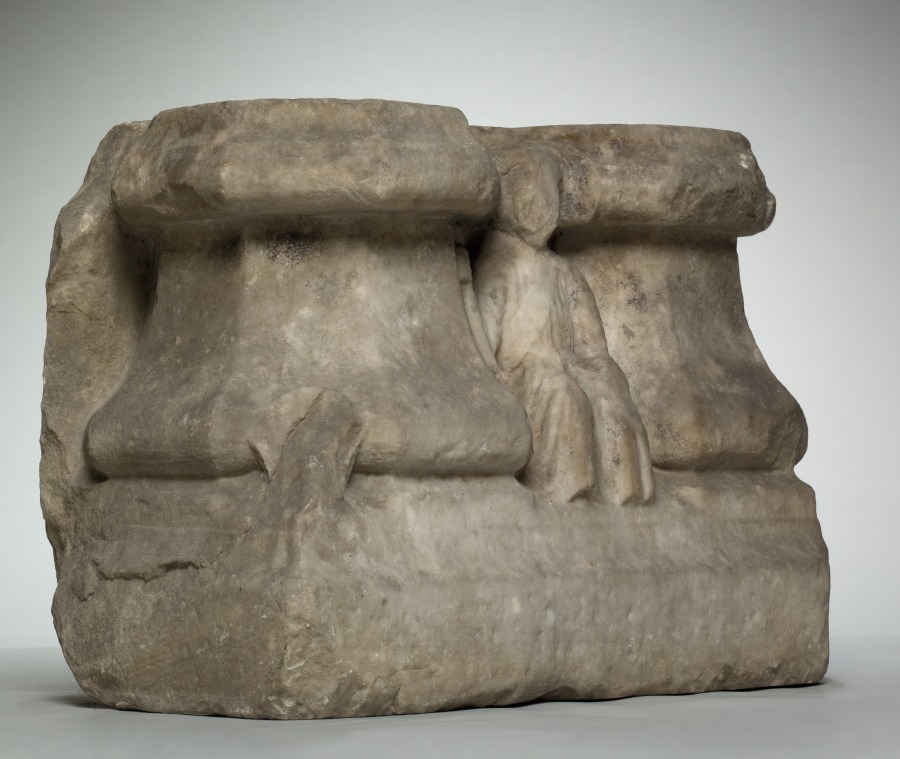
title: Double Column Base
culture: France, late 15th century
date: late 1400s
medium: marble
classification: Sculpture